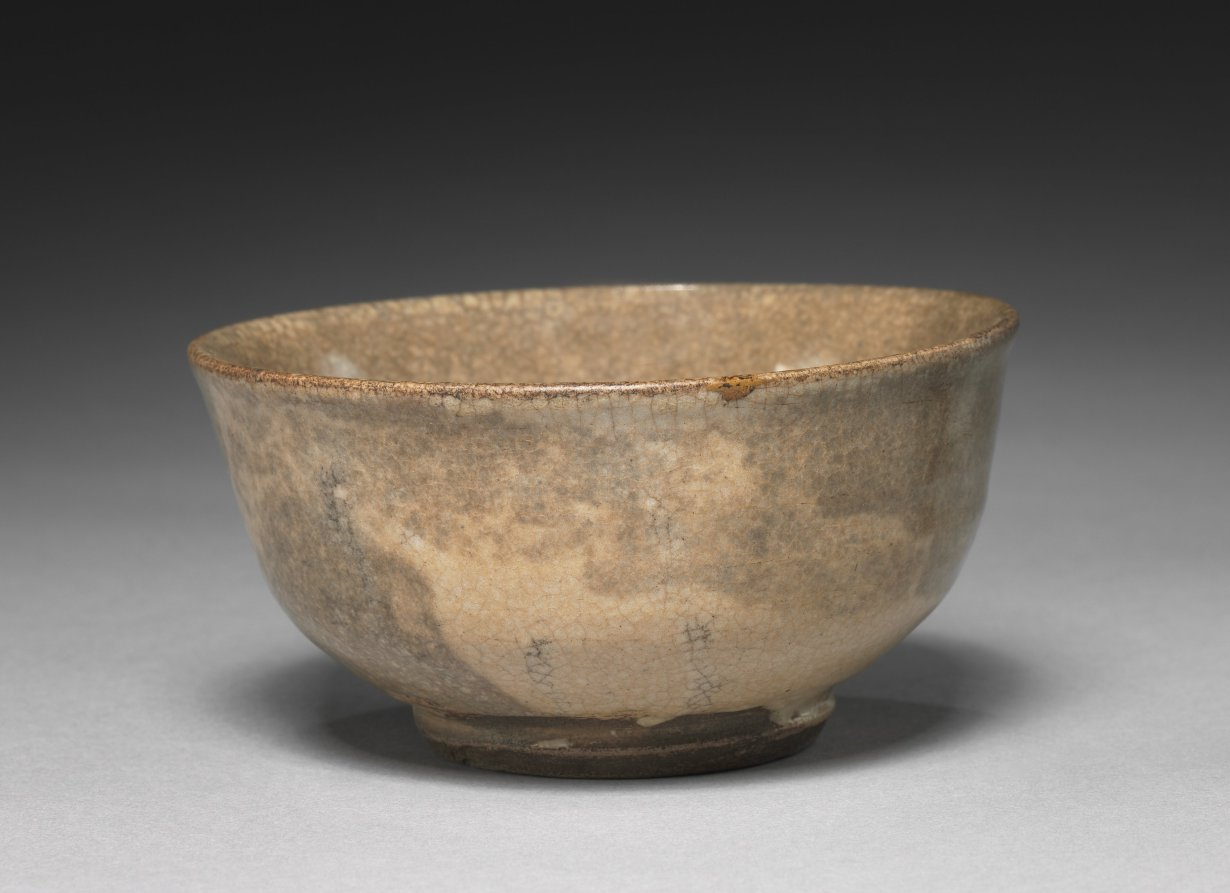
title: Bowl with White-slip Decorations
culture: Korea, Joseon dynasty (1392–1910)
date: 1500s–1600s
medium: glazed stoneware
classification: Ceramic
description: This type of wide-mouthed bowl was used every day in Korea, not exclusively for tea drinking. But when it was introduced to Japan around the early 1500s, its imperfect appearance, which evokes the aesthetics of wabi-sabi, caused it to be repurposed as a tea bowl. Korean tea bowls were circulated as a item of foreign luxury among Japanese military elites. Many Korean potters were abducted during the Japanese invasions (1592–98). Some settled there, and ended up leading the development of ceramic industry in Japan.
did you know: This type of humble tea bowl was highly praised among Japanese collectors for its imperfect beauty.